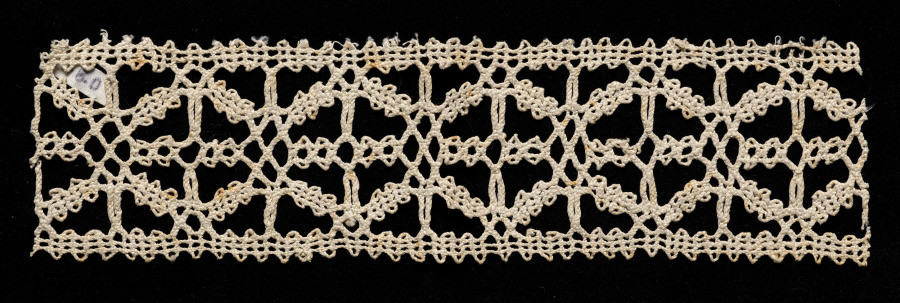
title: Lace Insertion (no selvage)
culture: Italy, Venice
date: 1540–60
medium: Bobbin lace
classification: Lace